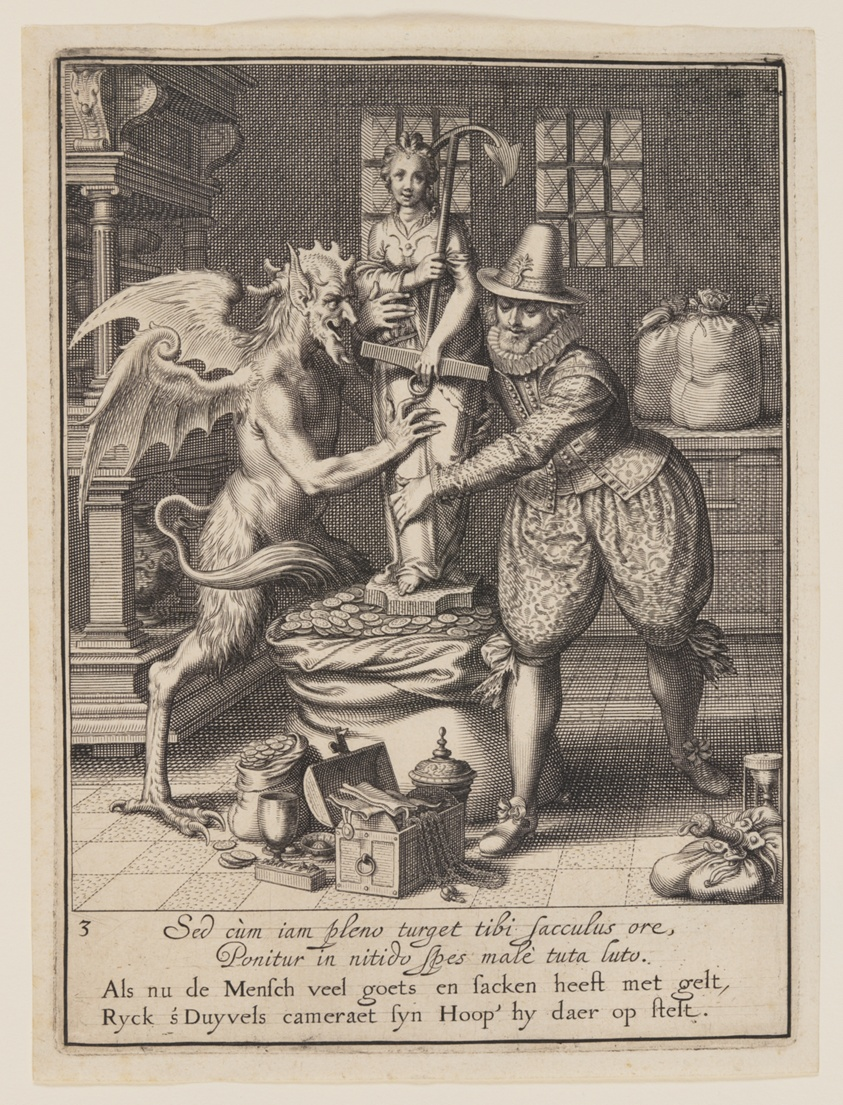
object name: Print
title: A Man and the Devil Filling a Sack with Money and Setting Up a Statue of Hope, from Allegory of the Misuse of Worldly Property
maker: Willem van Swanenburgh (Dutch, 1580–1612); after Maerten van Heemskerck (Dutch, 1498–1574)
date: 1609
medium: Engraving on ivory laid paper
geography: Netherlands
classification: engraving; paper; print; prints and drawing